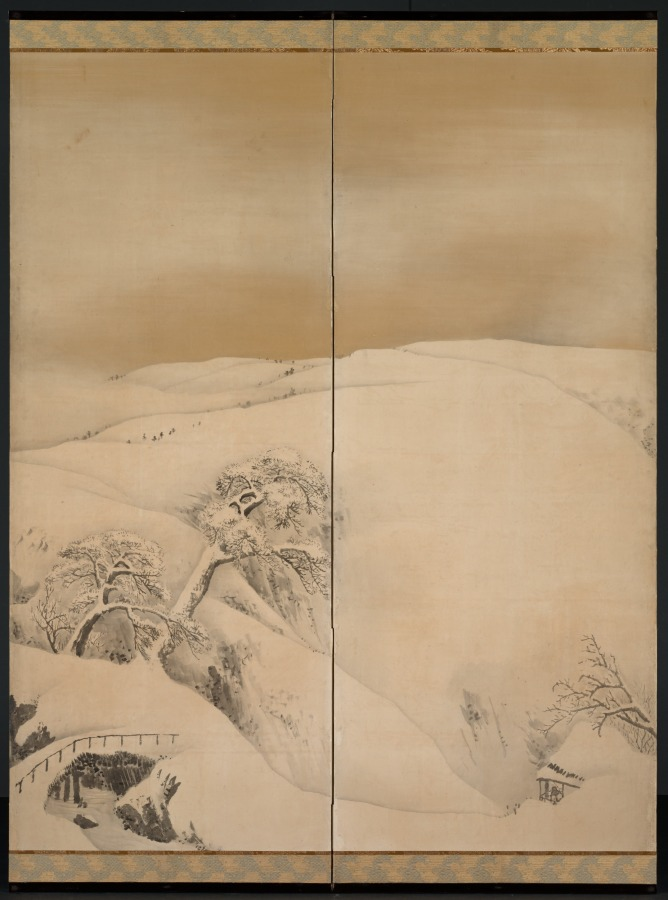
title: Winter Day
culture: Japan, Edo period (1615–1868)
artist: Maruyama Ōkyo (Japanese, 1733–1795)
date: 1784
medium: Six-panel folding screen, ink, gold, and silver on paper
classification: Painting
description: Ōkyo painted these panoramas in the summer of 1784. Regarded as Kyoto's most important painting teacher and accomplished artist, he had studied Western painting techniques, "realistic" sketching from nature, and traditional Japanese style painting (yamato-e). The naturalistic quality of these scenes results from a blend of detailed observation of nature and a remote, even detached regard for man's place in the world.